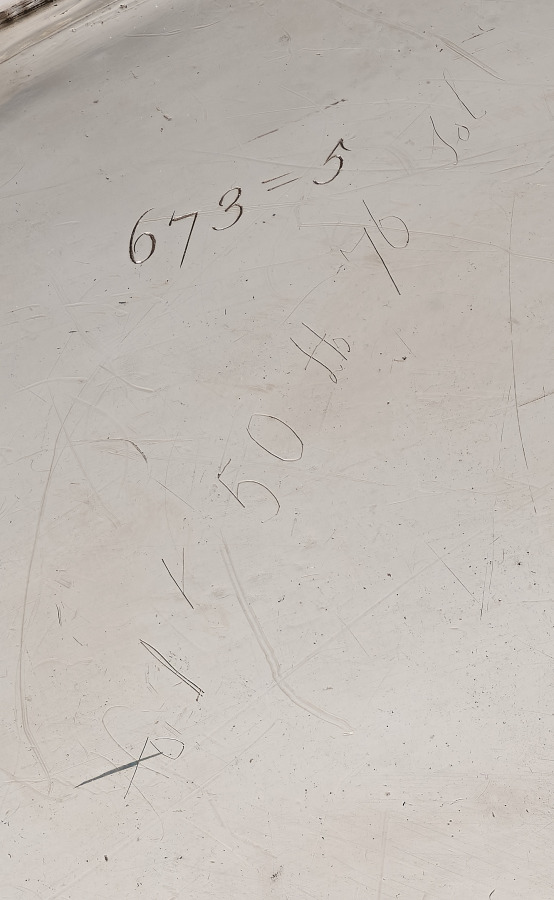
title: Stand for a Covered Tureen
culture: France, Paris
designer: Juste-Aurèle Meissonnier (French, 1695–1750)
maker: Pierre-François Bonnestrenne (French)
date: 1735–38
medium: silver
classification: Silver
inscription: engraved Meissonnier signature.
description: See entry for cover record 1977.182.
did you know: The langoustine, pigeon, and vegetables were cast using real examples giving the silver copies lifelike detail and appearance.